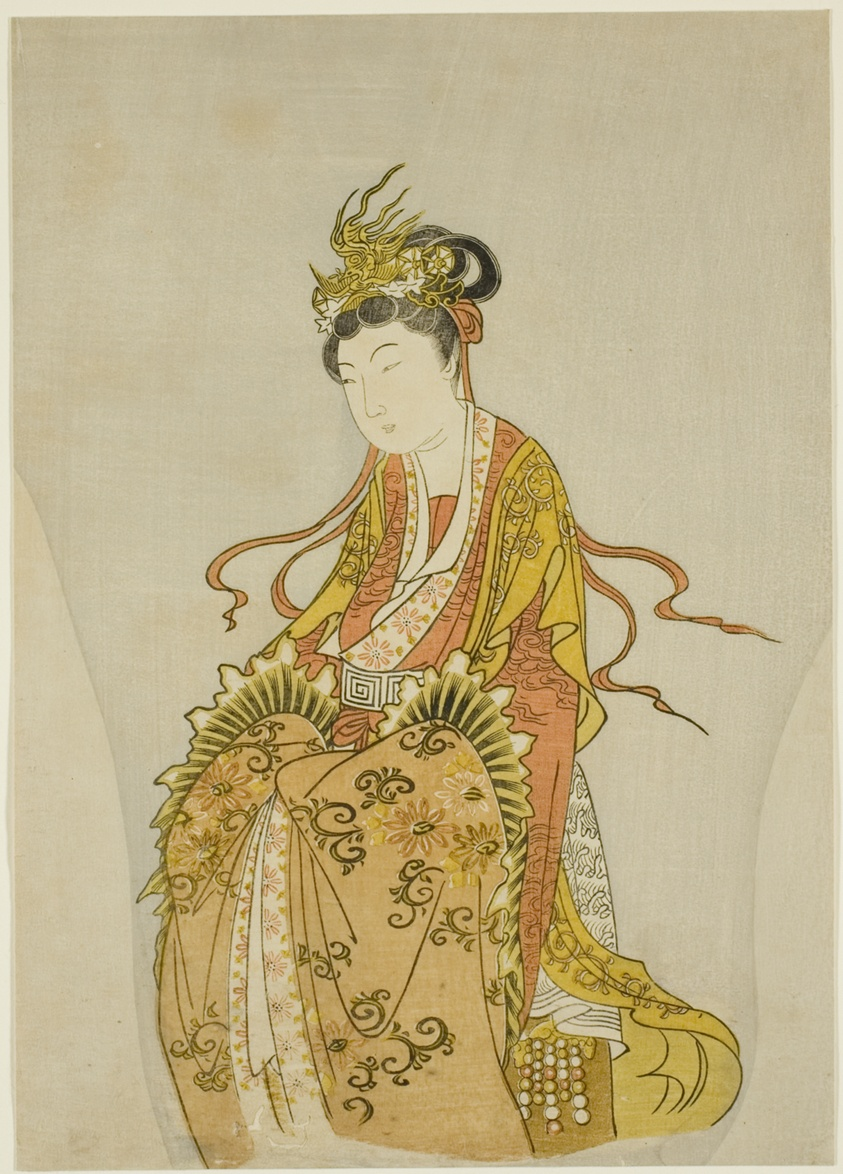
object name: Print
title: Incense That Revives the Image of the Dead - Lady Li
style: Japanese (culture or style)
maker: Attributed to Komatsuya Hyakki; Japanese, 1720–1793 (?)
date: 1765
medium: Color woodblock print; right sheet of chuban diptych (left sheet: 1925.2143)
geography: Japan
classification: woodblock print; print; asian art